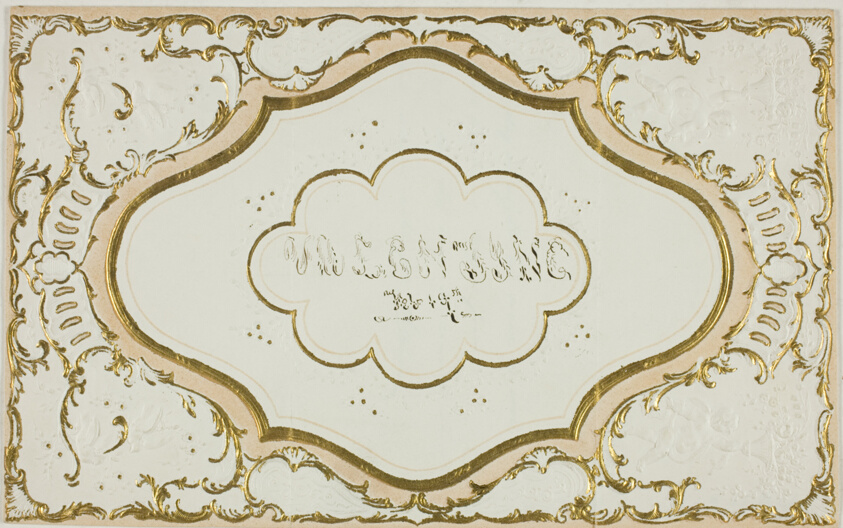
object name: Print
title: Untitled Valentine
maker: Unknown Artist; American, 19th century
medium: Pen and black ink on embossed and gold accented ivory wove paper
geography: United States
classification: valentine; prints and drawing; print